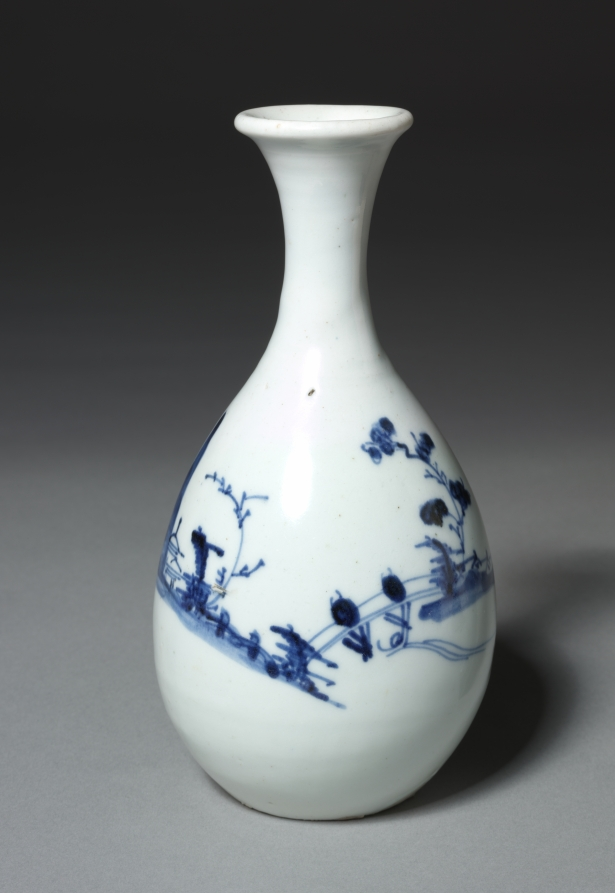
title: Sake Bottle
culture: Japan, Edo period (1615–1868)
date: mid- to late 1600s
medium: porcelain with underglaze blue (Hizen ware, Arita type, Imari style)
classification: Ceramic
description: When the late 16th-century shogun (military ruler) of Japan, Toyotomi Hideyoshi, invaded Korea in 1593, and then again in 1597, he made several momentous discoveries which were to change the course of Japanese cultural history. Hideyoshi's troops reported the existence of a sophisticated ceramic industry using large, multichambered kilns to produce high-fired porcelain wares. Since this technology did not exist in Japan, Hideyoshi ordered the resettlement of skilled potters in Japan. Not long thereafter this new kiln technology transformed tea taste and ceramic art in Japan. Subsequently, Korean potters uncovered for the first time in Japan the kaolin deposits fundamental to high-fired porcelain production. So beginning in the mid-1600s, the earliest white Japanese porcelains appeared, produced by Korean potters who transmitted traditional Korean ceramic shapes and surface decoration to their fellow Japanese workers. This small sake flask is a second generation example of that heritage and illustrates a fundamental cultural linkage between Korean and Japanese art.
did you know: Sake may be served heated or chilled, and, as with wine, the recommended serving temperature of sake varies greatly by type.